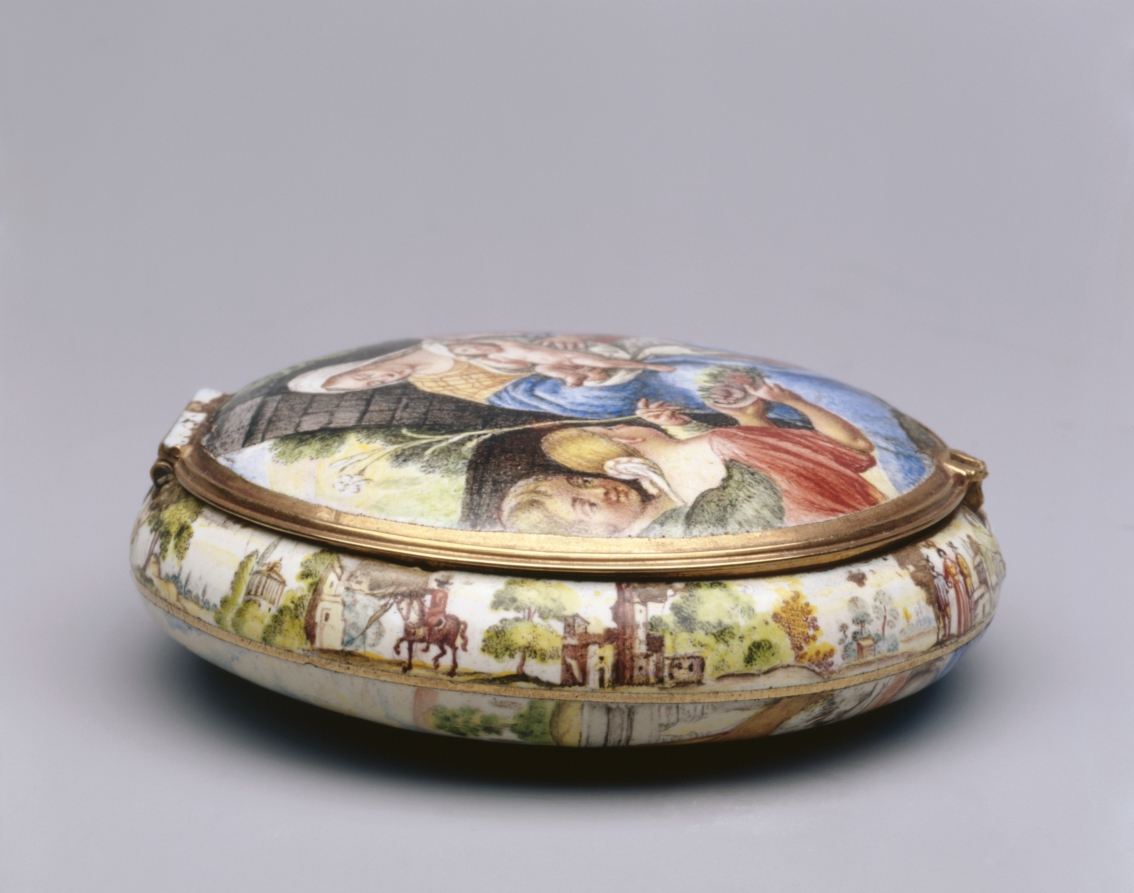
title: Watchcase (Boîtier de montre)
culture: France, 17th century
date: c. 1640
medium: gold and enamel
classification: Jewelry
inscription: [engraved on the rim]: "B8"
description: In the 1630s, the practice of painting with enamel on metal became a means for French miniature painters to achieve a more richly colored, durable product. Previously miniatures were painted with watercolor on vellum, a material made from animal skin. This case would have originally held a watch, but was later transformed into a simple box through the removal of the watch mechanism and ring. This watch case is richly painted inside and out with miniatures modeled after well-known religiously allegorical works.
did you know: Inspiration for the box’s miniatures was drawn from works by Peter Paul Rubens’ The Holy Family with Saints John the Baptist and Elizabeth (1615) (back panel) and Nicolas Cochin (interior base).